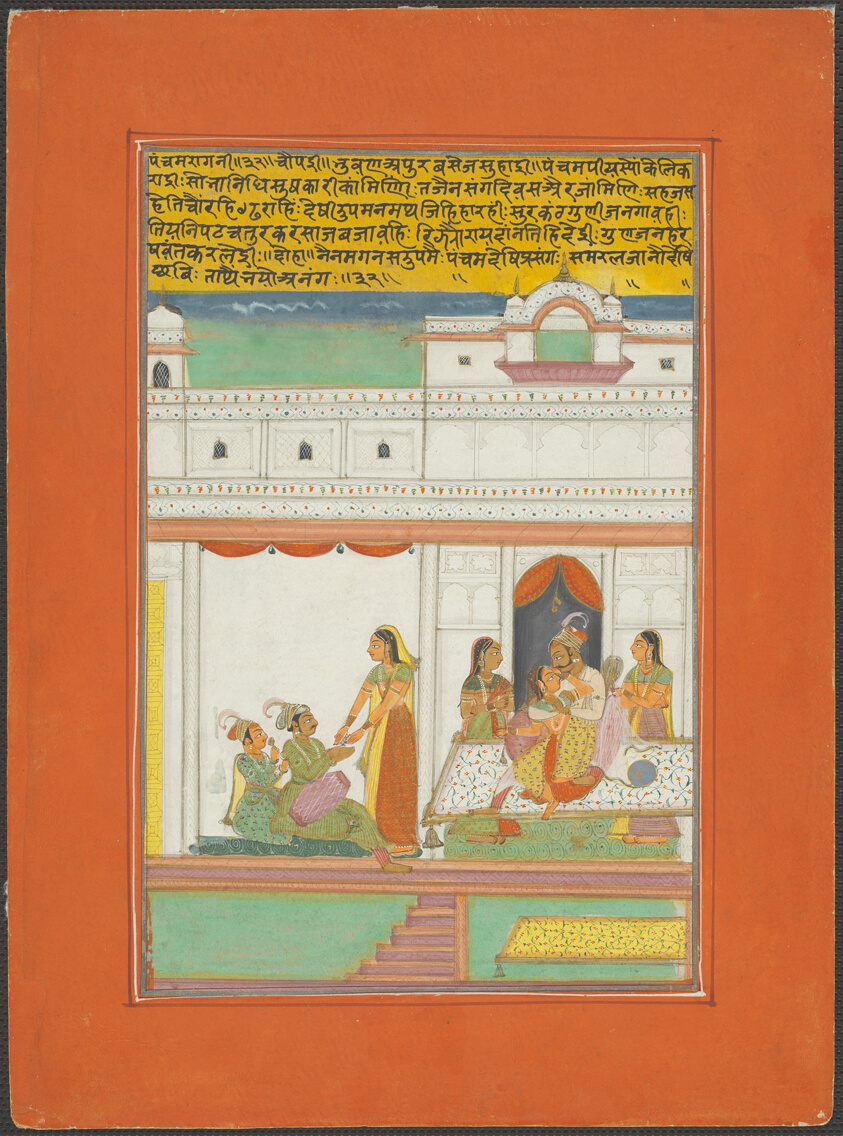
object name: Painting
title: Panchama Ragini, Page from a Jaipur Ragamala Set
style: South Asian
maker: India; Rajasthan, Jaipur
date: c. 1750-1770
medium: Opaque watercolor and gold on paper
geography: Rajasthan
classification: miniature painting; painting; asian art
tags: music, musicians